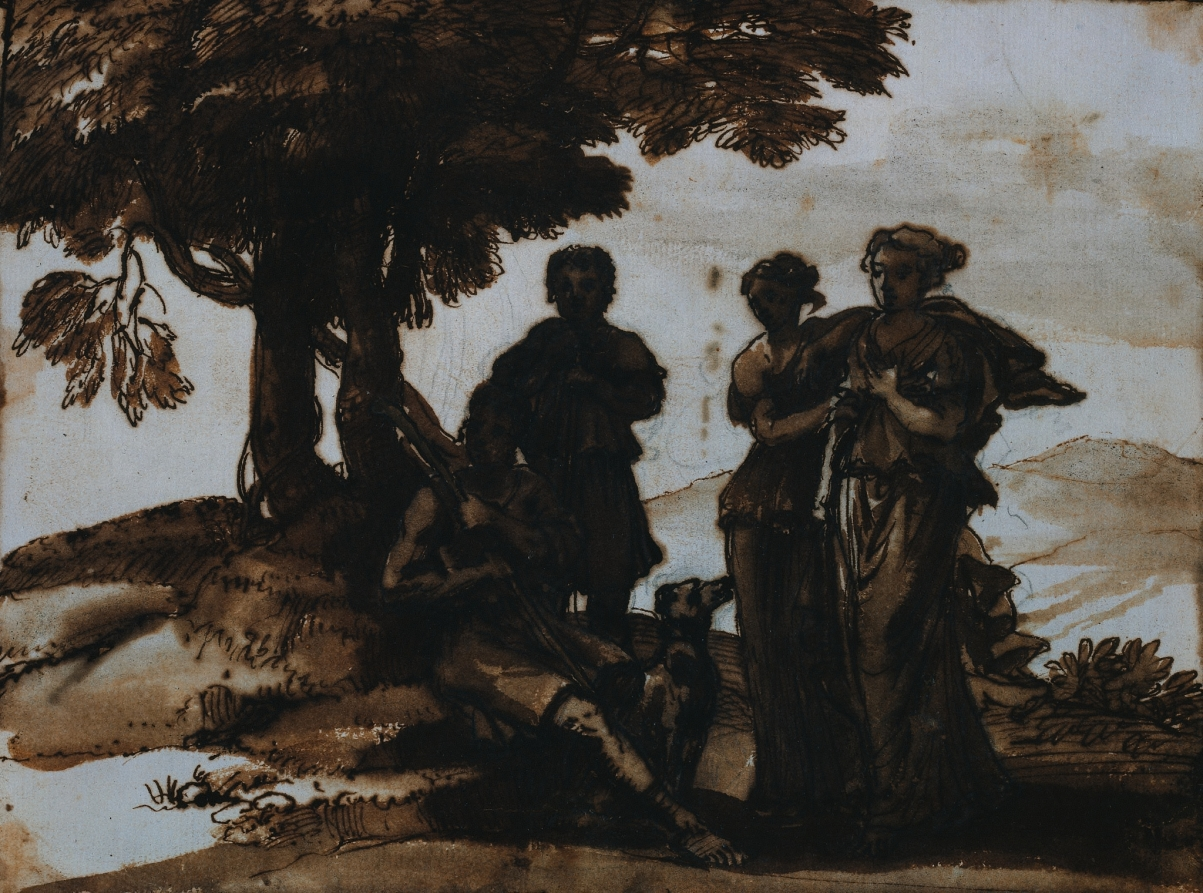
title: Pastoral Scene with Classical Figures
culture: France, 17th century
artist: Claude Lorrain (French, 1604–1682)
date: c. 1640–1645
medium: pen and brown ink and brush and brown and gray wash over graphite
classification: Drawing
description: Claude Lorrain changed the direction of European landscape painting by opening up vistas that fade into either morning or evening sun. A prolific draftsman, he emphasized the tranquil and idyllic nature of the Roman countryside.